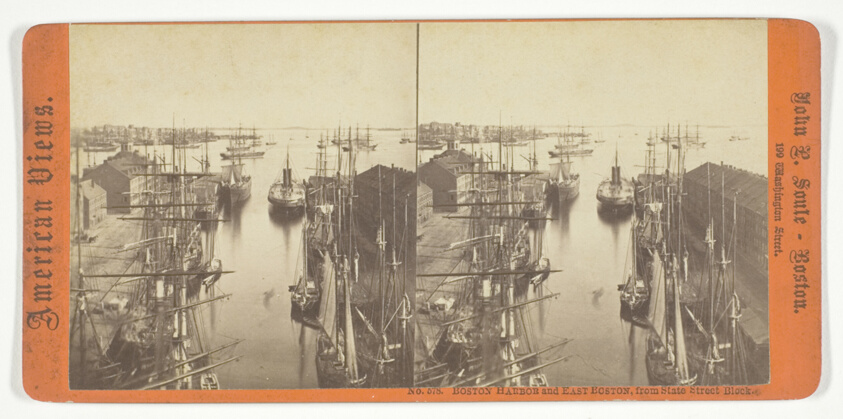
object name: Photograph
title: Boston Harbor and East Boston, from State Street Block, No. 578 from the series "American Views"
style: 19th century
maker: John P. Soule (American, 1828-1904)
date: 1861/88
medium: Albumen print, stereo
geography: Boston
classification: photography; photograph